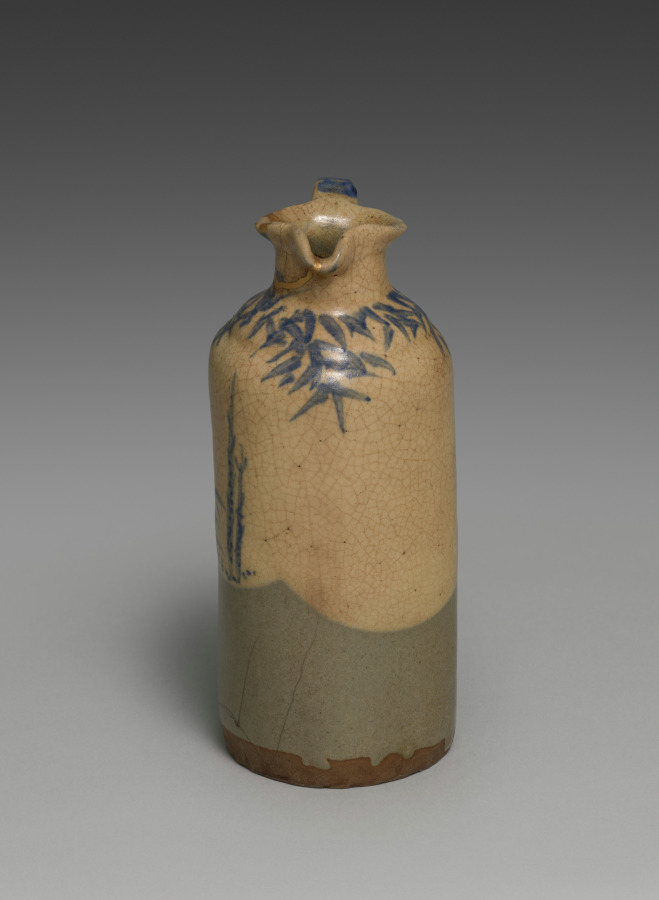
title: Sake Pourer with Bamboo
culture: Japan, Edo period (1615–1868)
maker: attributed to Seifū Yohei I (Japanese, 1801–1861)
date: c. 1844–57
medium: one of a pair of sake flasks; stoneware with white slip, underglaze blue and gold repair (kintsugi) (Kyoto ware)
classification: Ceramic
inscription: The storage box for the pair of vessels is inscribed and impressed with seals.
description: This pair of sake pourers adorned with with bamboo and bellflowers is attributed to the founder of the Seifū Studio, Seifū Yohei I (1801–1861). Yohei I, the lineage founder, was born to the Yasuda family in the city of Kanazawa, which faces the Sea of Japan. His home province of Kaga (in present-day Ishikawa Prefecture) produced its own ceramics, known as Kutani ware, but for his training as a potter, Yohei I chose Kyoto, which produced the more technically advanced porcelainware. He moved to Kyoto around the 1820s and became apprenticed to Nin’ami Dohachi, a leading potter in the city. He later struck out on his own, and it is likely that his teacher gave him the name Seifu Yohei. His works include many exquisitely painted copies of Chinese porcelain, and he also produced stoneware with overglaze color enamels that emulated works in the style of Ogata Kenzan (1663–1743) at which his teacher excelled.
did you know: Sake may be served heated or chilled, and, as with wine, the recommended serving temperature of sake varies greatly by type.